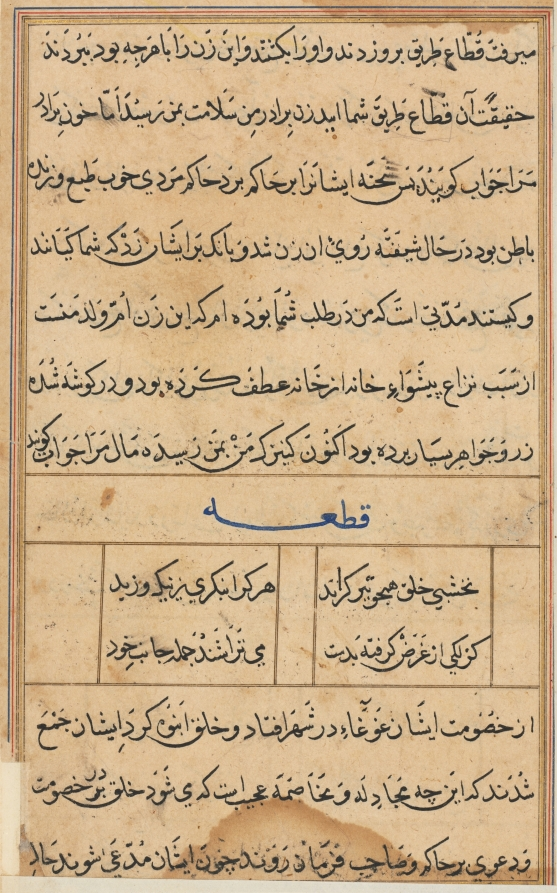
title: Page from Tales of a Parrot (Tuti-nama): text page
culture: Mughal India, court of Akbar (reigned 1556–1605)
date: c. 1560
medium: gum tempera, ink, and gold on paper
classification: Painting